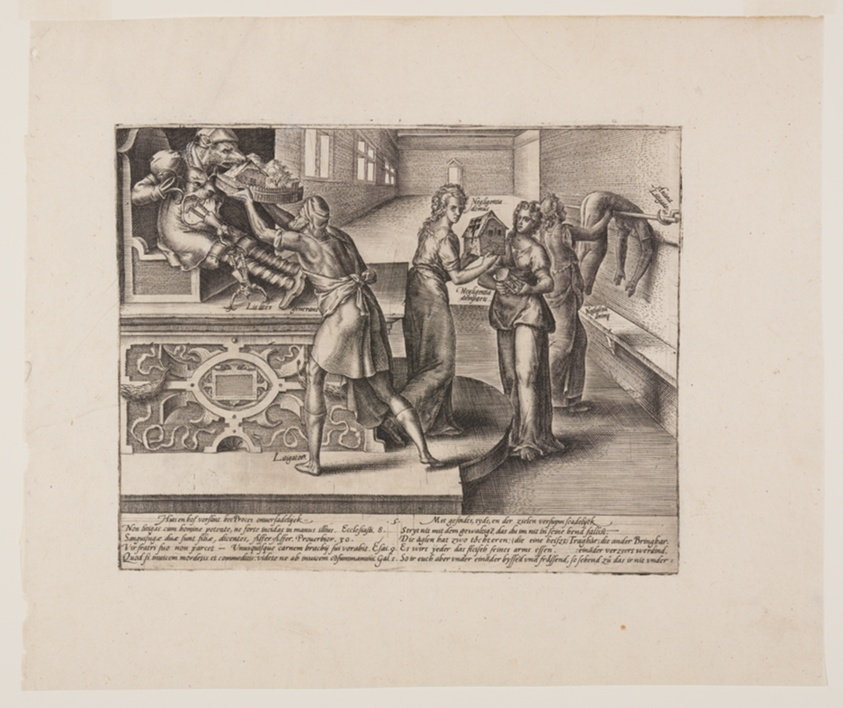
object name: Print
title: The Expense of Litigation, from Litis Abusus (The Abuses of the Law)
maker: Hendrick Goltzius (Dutch, 1558–1617)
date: c. 1576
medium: Engraving on ivory laid paper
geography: Netherlands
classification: print; paper; prints and drawing; engraving